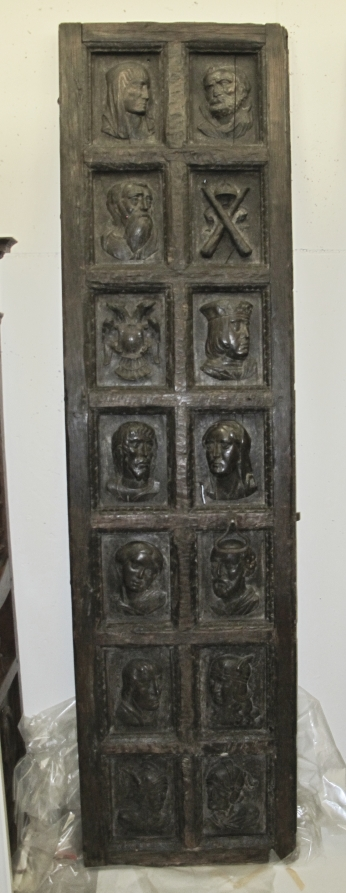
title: Studio Door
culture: Spain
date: 1500s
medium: wood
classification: Furniture and woodwork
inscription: "NON PLUS ULTRA."